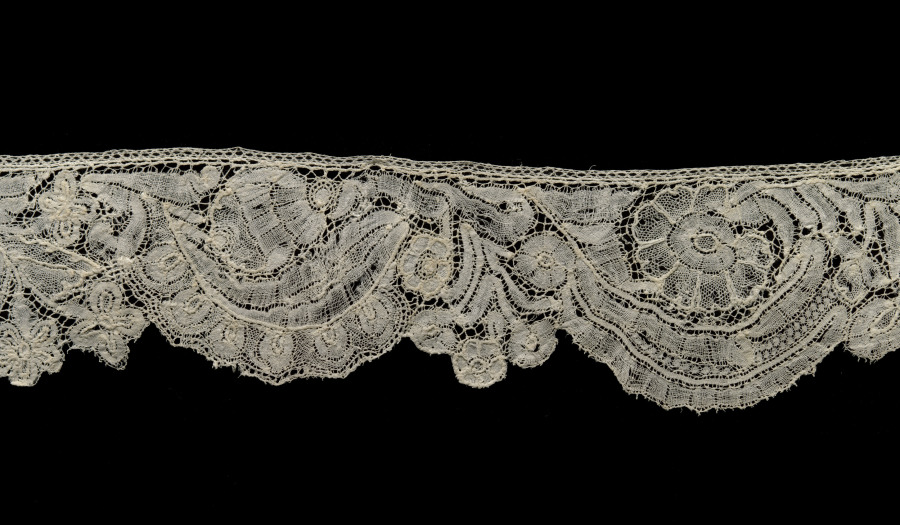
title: Lace Edging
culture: England, Devonshire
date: 1740–60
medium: Bobbin lace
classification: Lace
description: Although made in Great Britain, this lace copies Brussels' Point d'Angleterre lace.